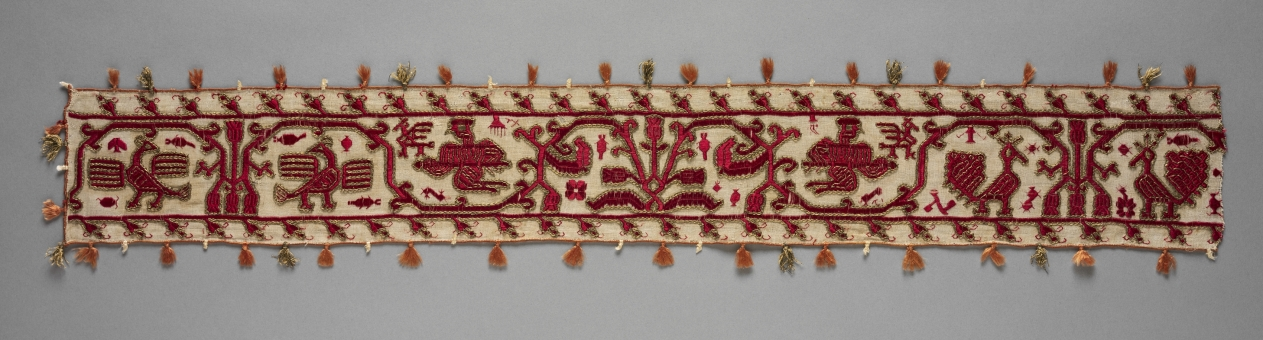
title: Band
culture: Greece, Cyclades Islands, Southern Group, Melos ?, 17th century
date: 1600s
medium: embroidery; silk and gold filé on linen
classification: Embroidery